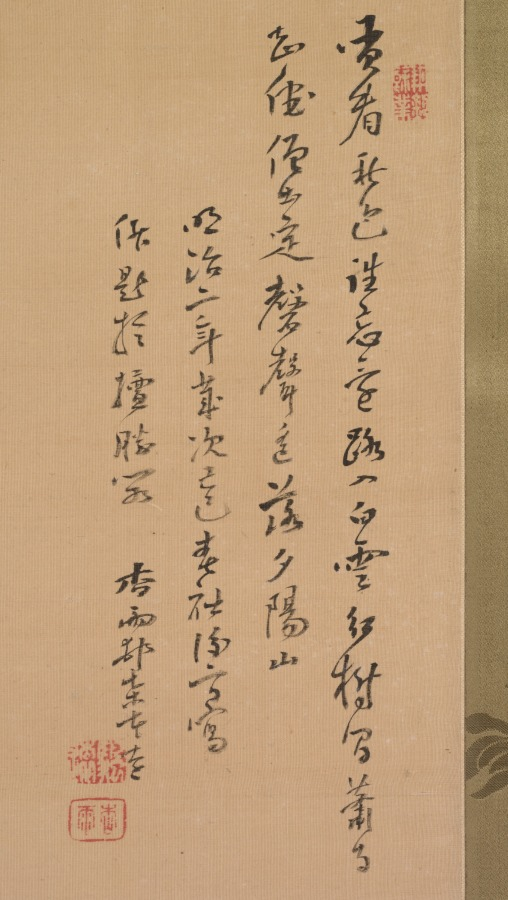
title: Sunset over Autumn Mountains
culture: Japan, Edo period (1615–1868)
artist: Hoashi Kyōu (Japanese, 1810–1884)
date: 1869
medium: hanging scroll; ink and light color on silk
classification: Painting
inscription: translation of poem [by Nora Liu]: The way was forgotten while enjoying the conversation and colors of Autumn, The road entered among the red trees and the white clouds, The trace of a path led to the lonely temple where the monks received enlightenment, The sound of chimes echo remotely in the mountains where the sunset falls. In the year 1869, Kyou